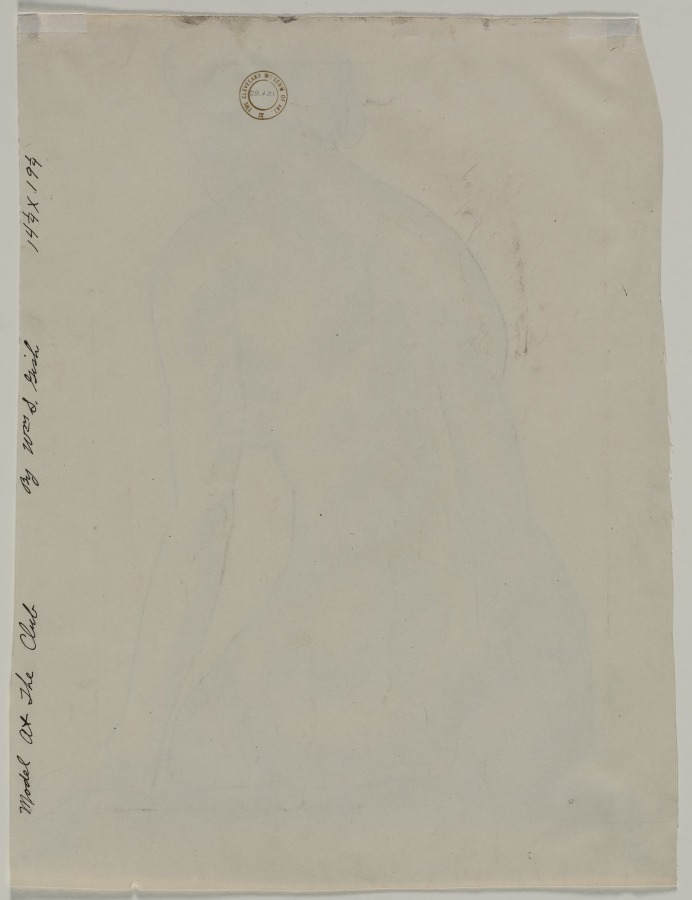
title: Model at the Club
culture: America, Ohio, Cleveland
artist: William S. Gisch (American, 1906–1989)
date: 1929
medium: pen and ink and brown and black chalk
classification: Drawing